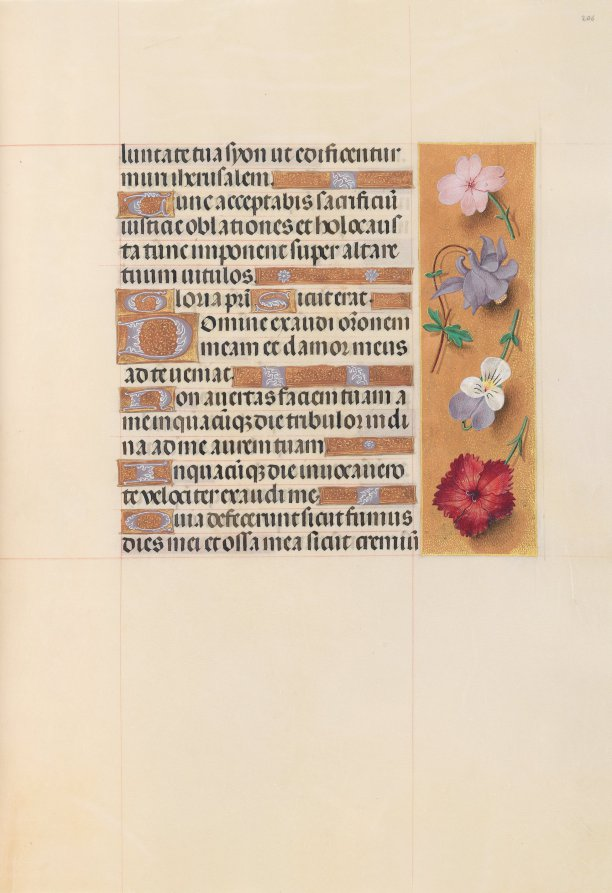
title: Hours of Queen Isabella the Catholic, Queen of Spain: Fol. 206r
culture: Flanders, Ghent and Bruges, late 15th century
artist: Master of the First Prayerbook of Maximillian (Flemish, c. 1444–1519)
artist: and Associates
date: c. 1500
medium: ink, tempera, and gold on vellum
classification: Bound Volume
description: This manuscript was illuminated by a circle of at least five highly organized manuscript painters active in the Flemish cities of Ghent and Bruges. The principal illuminator was Alexander Bening, who painted the majority of the book's miniatures. Manuscripts produced by this circle of artists are renowned for the decoration of their borders, which typically feature a rich variety of realistically-painted flowers, birds, and butterflies. This prayer book, called a book of hours, was intended not for a cleric, but for the private devotions of a lay person-in this case, Isabella the Catholic, Queen of Spain (1451-1504). Isabella's coat of arms embellishes the book's frontispiece. It is unlikely that the book was commissioned by the Queen herself; rather, she probably received it as a diplomatic gift from someone courting her patronage, perhaps Cardinal Francisco Jimenez de Cisneros. A Franciscan friar, Jimenez was dependent upon Isabella for his advancement, first to the post of Queen's confessor in 1492, and then to Archbishop of Toledo in 1495.